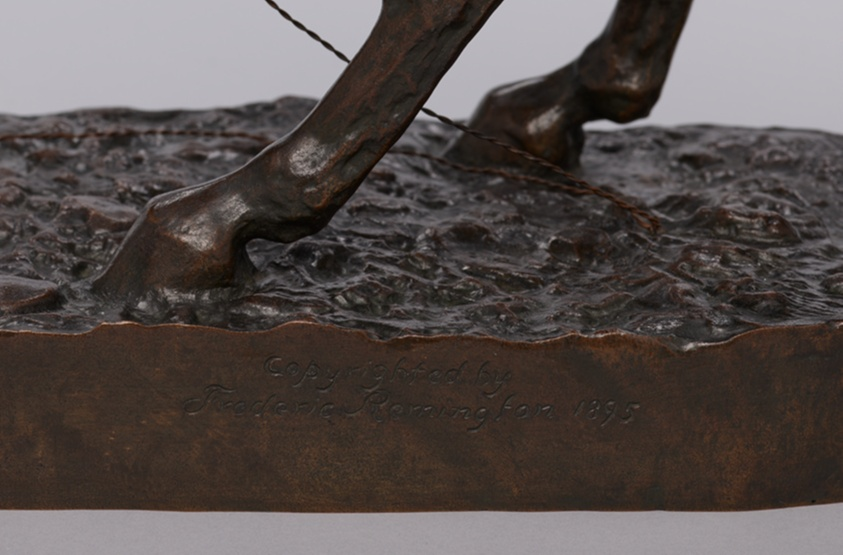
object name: Sculpture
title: The Bronco Buster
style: 19th century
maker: Frederic Remington (American, 1861–1909); Cast by Henry-Bonnard Bronze Co. (American, 19th century)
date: Modeled 1895, cast 1899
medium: Bronze with brown patina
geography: United States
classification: sculpture; american arts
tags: animals, rodeos, cowboys, horses, horseback riding, people, portraits